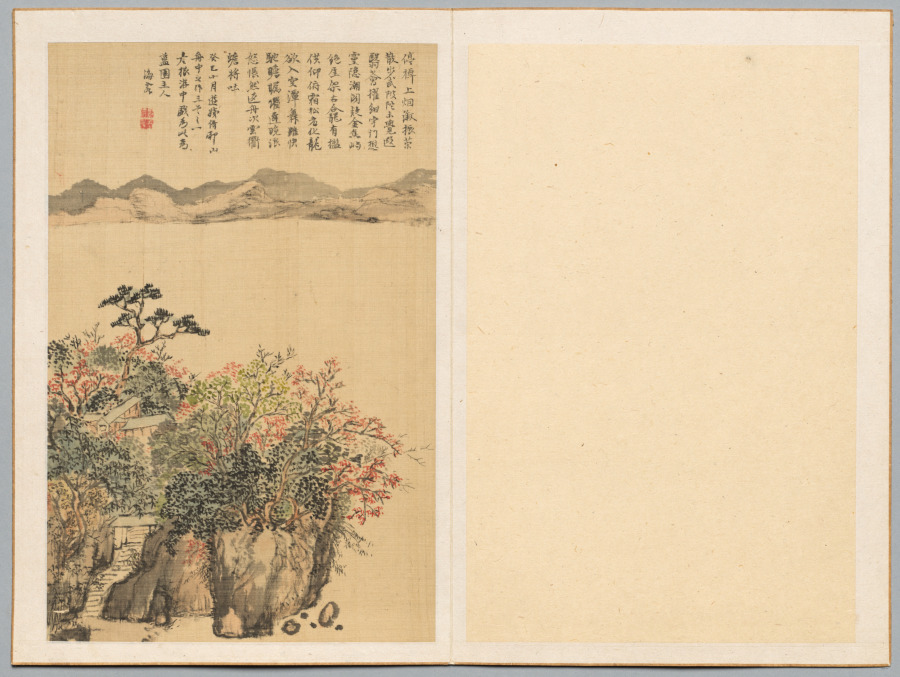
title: Ikiyasan Isakiji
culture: Japan, Edo period (1615–1868)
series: Famous Early Modern Calligraphers and Painters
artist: Nukina Kaioku (Japanese, 1778–1863)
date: 1833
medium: leaf from a pair of folding albums; ink and color on silk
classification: Portfolio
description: The Buddhist temple Ikiyasan Isakiji lies about 12.4 miles (20 km) from Hikone Castle, on the shore of Lake Biwa in central Japan. Nukina Kaioku depicted the temple as seen from a boat while touring Hikone. He also inscribed a poem about the experience, explaining that it was one of three written during the journey. Born into a samurai family specializing in archery, Kaioku later became recognized as one of the three greatest calligraphers of his time.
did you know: Nukina Kaioku was from a family that taught archery to regional military rulers, but being physically weak, he concentrated his efforts in calligraphy and studying Confucian philosophy, a system of thought prized by the military class.